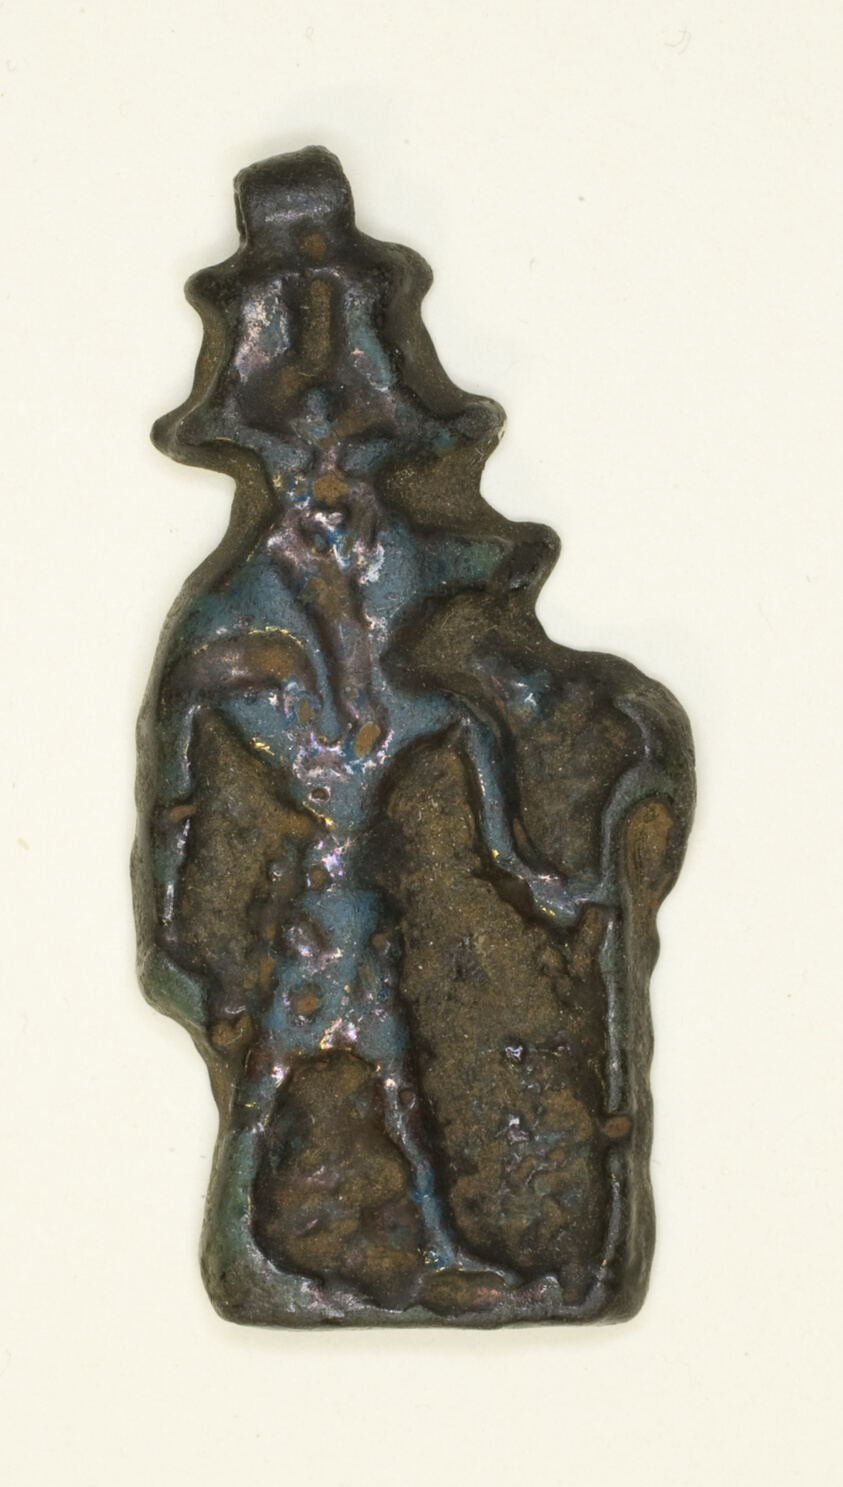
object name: Costume and Accessories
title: Amulet of the God Anubis wearing Atef Crown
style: egyptian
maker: Egyptian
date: Late Period (about 664–332 BCE)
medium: Faience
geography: Egypt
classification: amulet; jewelry; ceramics; ancient art; costume; faïence (composite material)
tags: gods (deities)